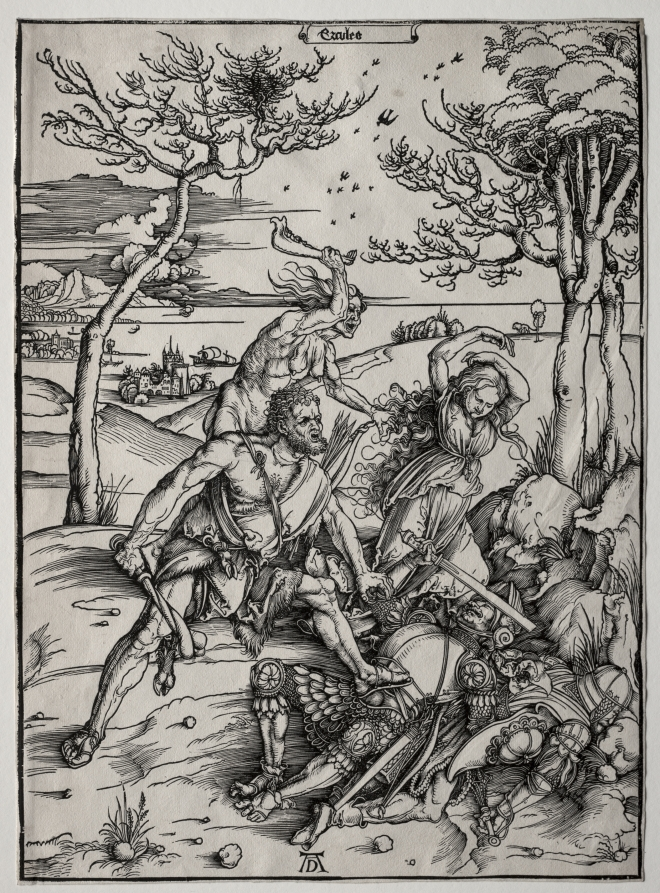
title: Hercules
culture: Germany, late 15th Century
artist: Albrecht Dürer (German, 1471–1528)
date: c. 1496–97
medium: woodcut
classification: Print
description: Even though Dürer entitled this work Ercules, the narrative of the representation remains highly debated. The most recent interpretation suggests that Dürer adapted the scene from an obscure Roman tragedy, one he may have learned through his humanist friends. The story describes how prior to Hercules’ first heroic labor, the goddess Juno incited within him a monstrous rage. This resulted in the killing of a tyrant, seen under Hercules’ left foot, and the murder of his own family, represented here by his frightened wife Megara. A maniacal old woman-a Fury, goddess of vengeance and the embodiment of Hercules’ rage-prepares to assail Megara with an animal jawbone. According to this reading then, women are the source and manifestation of Hercules’ murderous wrath, an obvious contrast to his later heroism.